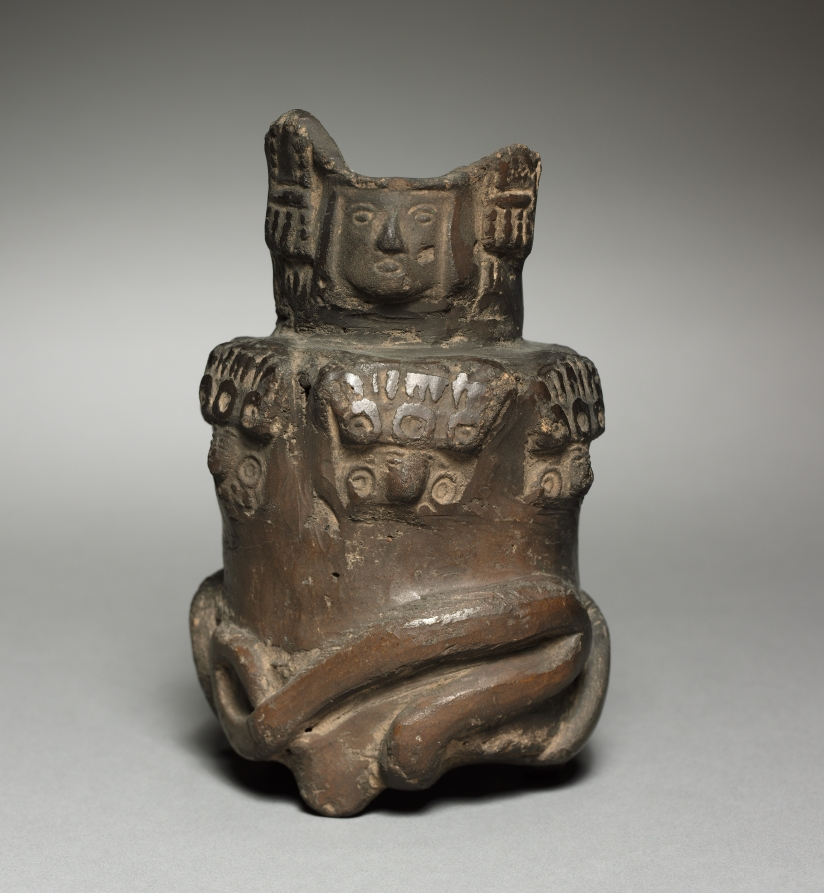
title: Vase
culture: Peru, Tiwanaku style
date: 800–200 BCE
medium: pottery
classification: Ceramic